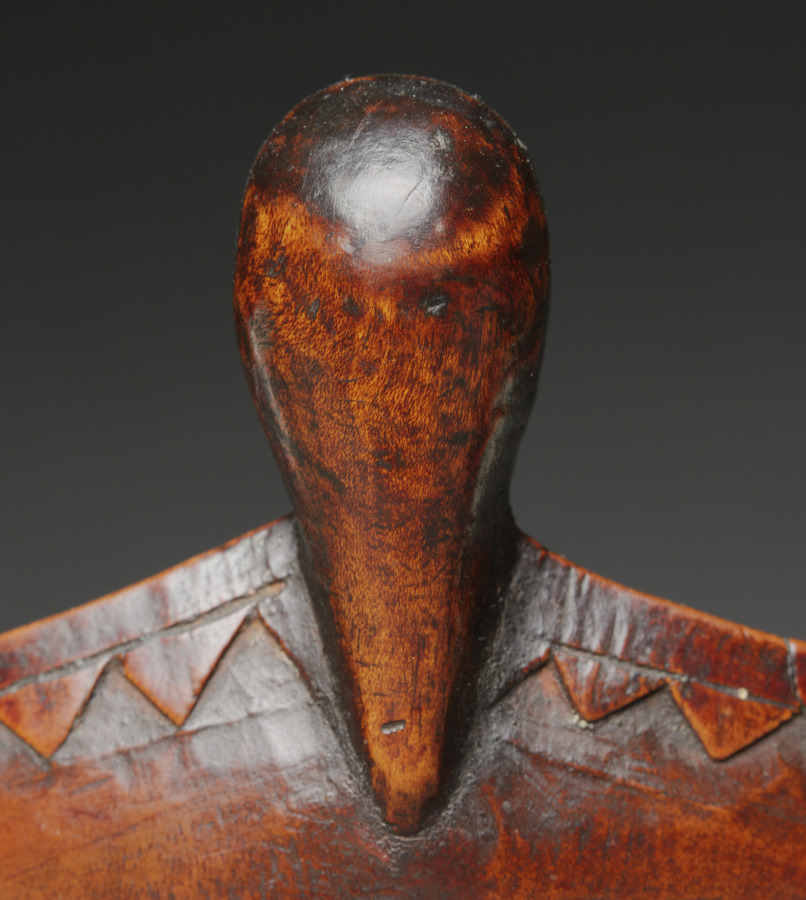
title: Bowl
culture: Native North America, Northeastern Woodlands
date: early 1800s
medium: wood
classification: Wood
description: Fine wooden bowls were often used during feasts in the Northeastern Woodlands. The heads on the rims may represent spirit beings, perhaps the owner’s guardian spirits, acquired through dreams or visions—thought to be the ultimate sources of truth. The medium may also be profoundly meaningful. A Great Lakes (Meskwaki) Native said in 1911, “The murmur of the trees when the wind passes through is but the voices of our grandparents. Often a whole forest hums with talk . . . we often hear the sound of their laughter and the sound of their lamentations.”